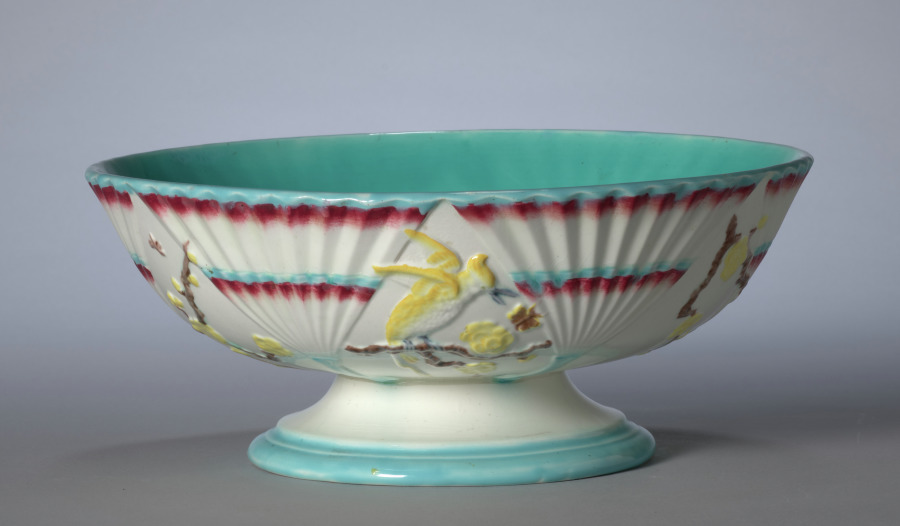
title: Bowl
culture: England, Staffordshire, 19th century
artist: Wedgwood Factory (British)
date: c. 1880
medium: earthenware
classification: Ceramic